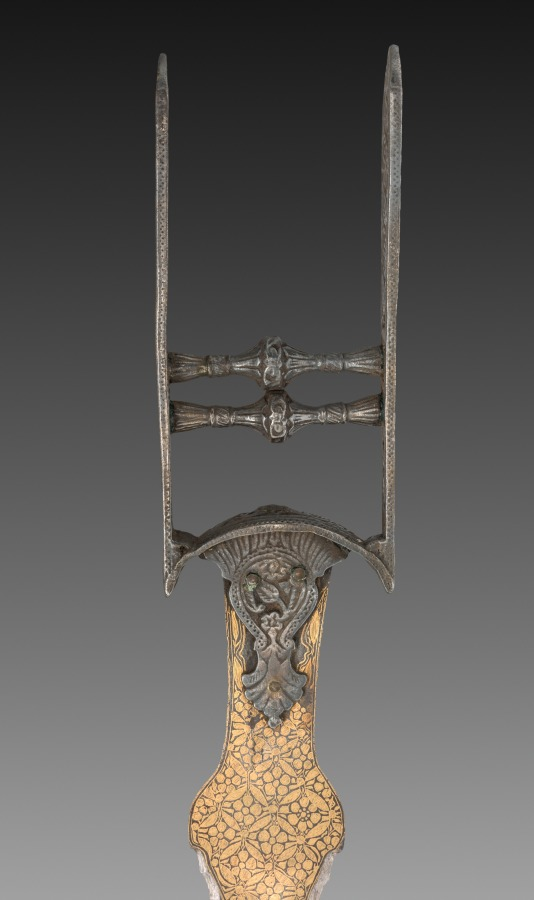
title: Dagger (Katar)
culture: India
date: 1800s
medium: steel with gold damascening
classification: Arms and Armor